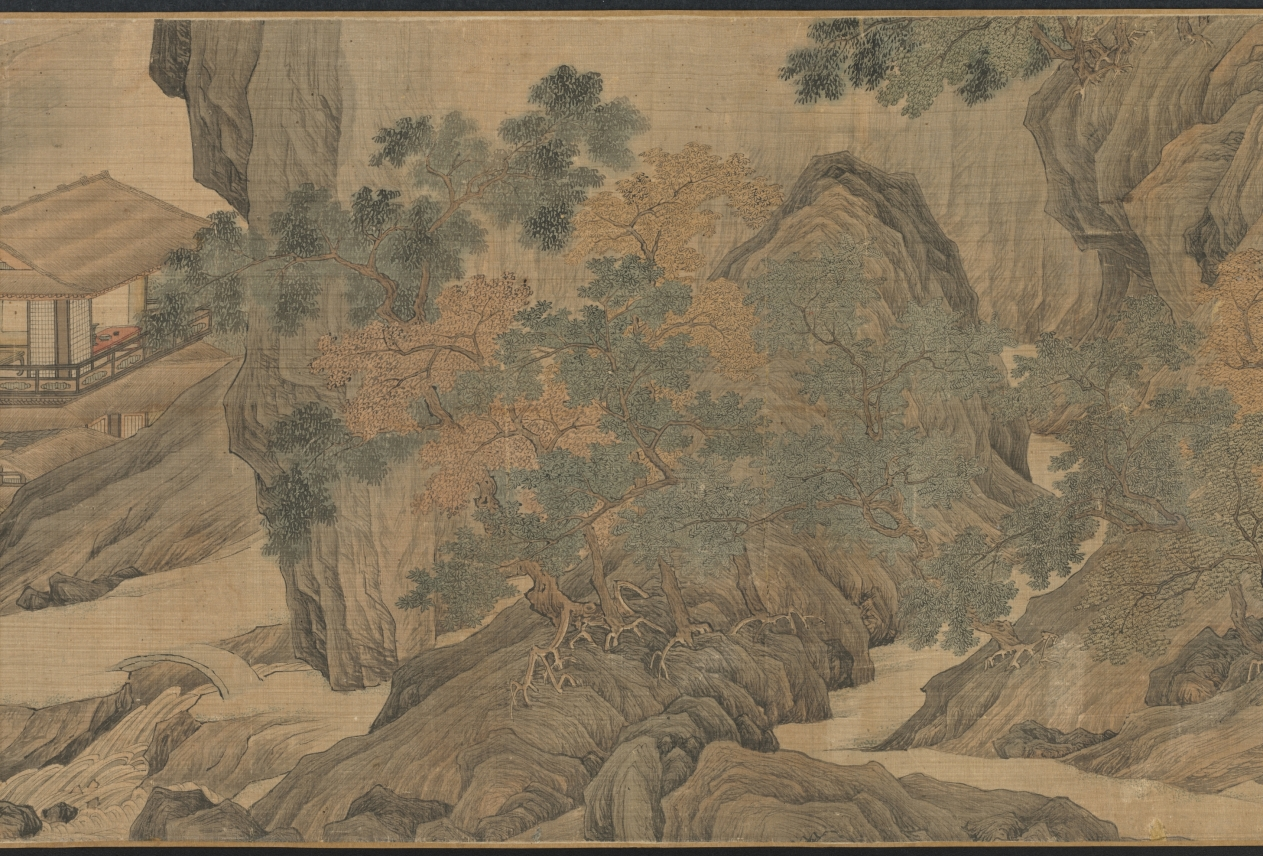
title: Scholar-Hermits in the Autumn Mountains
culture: China, Ming dynasty (1368–1644)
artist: Tang Yin (Chinese, 1470–1523)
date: 1500–1510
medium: handscroll, ink and light color on silk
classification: Painting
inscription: Artist's signature and 2 seals at end of scroll: Tang Yin [seals] T'ang Po-hu; T'ang Tzu'wei t'u-shu.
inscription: Title on frontispiece by Li Cho-kung (dates unknown).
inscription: 1 colophon and 11 additional seals: 1 colophon dated 1915 of Wu Tso-hsi (19th-20th c.); 2 seals of Gao Qifeng 高奇峰 (1889–1933); 5 seals of C. C. Wang 王季遷 (1907–2003); 4 seals unidentified.